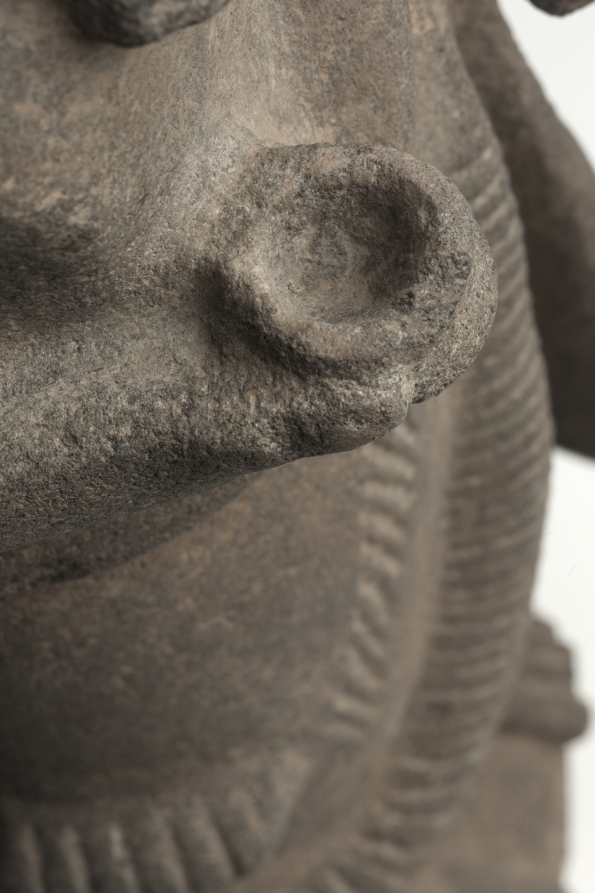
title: Priest-King or Deity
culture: Hittite, North Syria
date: c. 1600 BCE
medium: basalt with bone eyes (left, ancient; right, restored)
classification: Sculpture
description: The Hittites migrated into Anatolia in the 3rd millennium BCE and spoke an Indo-European language, a group that includes Greek, Latin, Persian, Sanskrit, English, and most modern European languages. They were the first ancient people to use iron for weapons. From about 1600–1200 BCE their empire was at its peak, extending from central Anatolia to Syria, and south along the eastern Mediterranean. Their vast empire and interest in commerce enabled the Hittites to spread Mesopotamian ideas and culture throughout the ancient Mediterranean world. This large basalt sculpture is exceptionally rare in depicting a Hittite god or priest-king wearing a horned conical crown, false beard, and long robe. He holds a bowl in his right hand and once held something in his left, perhaps a staff or sword.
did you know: The left eye of the sculpture is the original bone inlay while the right eye is a modern restoration done after the piece was damaged.